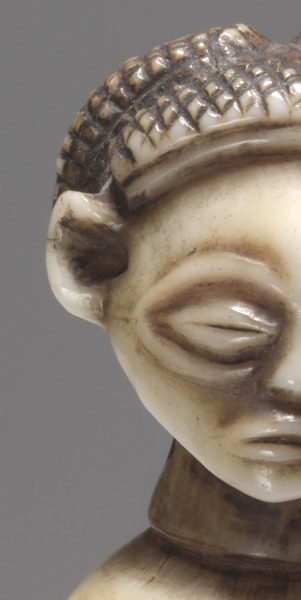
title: Whistle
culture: Central Africa, Democratic Republic of Congo or Angola, Chokwe people, late 1800s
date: late 1800s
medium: Probably hippopotamus ivory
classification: Musical Instrument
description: This was the first sculptural work from Africa to enter the CMA's collection.